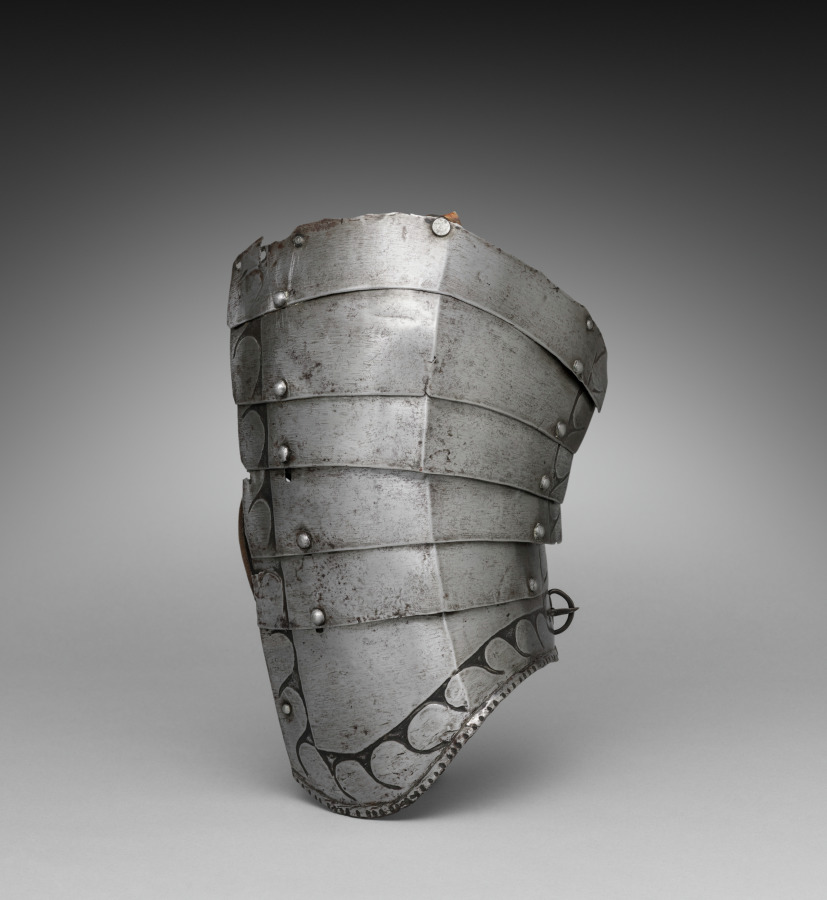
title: Espalier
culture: Germany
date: 1500s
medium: steel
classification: Arms and Armor